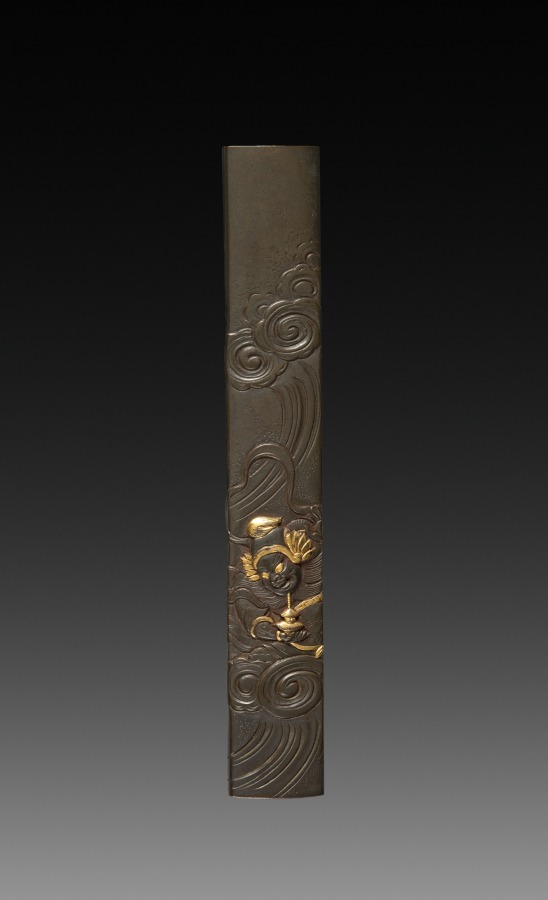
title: Knife Handle (Kozuka)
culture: Japan, Edo period (1615–1868)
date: early to mid-1800s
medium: inlaid bronze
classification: Metalwork